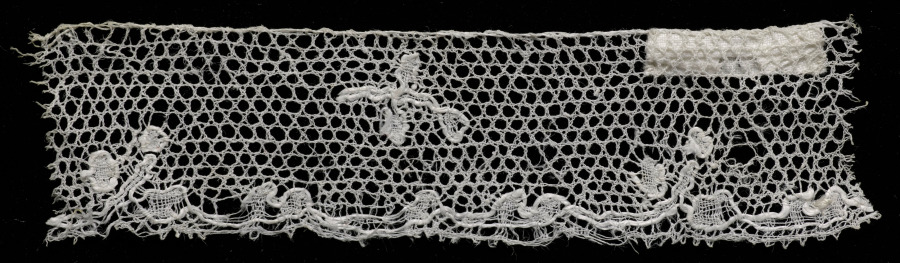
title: Lace Edging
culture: Spain, Seville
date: 1700s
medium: Bobbin lace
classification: Lace